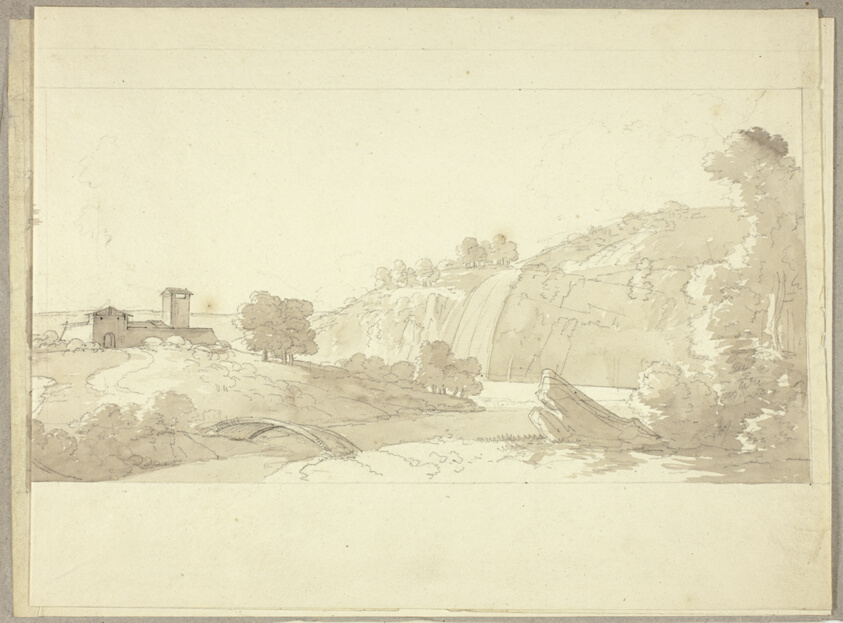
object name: Drawing and Watercolor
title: Panoramic Italian Landscape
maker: Pierre Antoine Mongin (French, 1761/62-1824/27)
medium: Brush and brown wash, with black chalk, on cream wove paper (pieced together), tipped on gray wove paper with pink and blue fibers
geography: France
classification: ink or chalk wash; drawings (visual works); prints and drawing